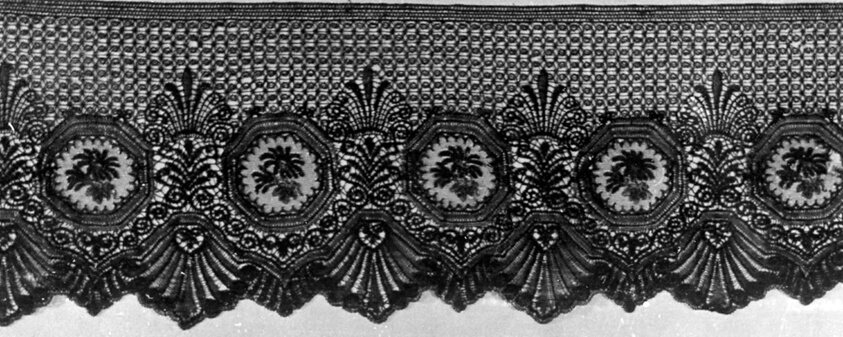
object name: Textile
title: Flounce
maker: France, Le Puy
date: 1870s/80s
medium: Silk and mohair, bobbin straight lace; (made in horizontal strips)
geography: France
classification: textile; lace - bobbin